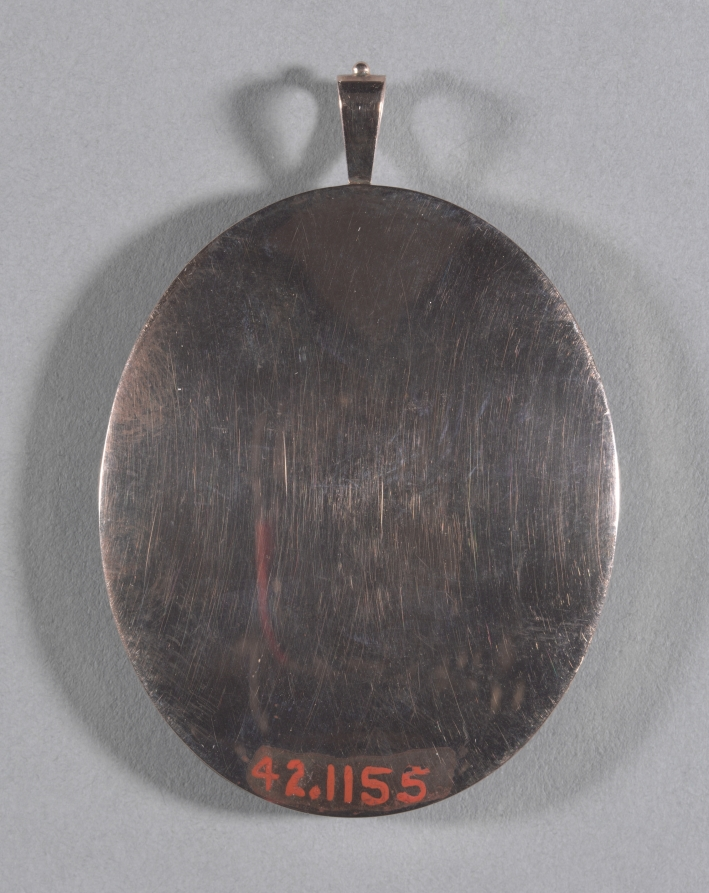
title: Portrait of Mrs. Nathaniel Bailey, née Lamack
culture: England, 18th century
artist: John I Smart (British, 1741–1811)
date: c. 1776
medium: graphite and wash on laid paper in a modern gold frame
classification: Portrait Miniature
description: Although it is impossible to say if it was always part of the artist’s process to execute a preparatory sketch prior to painting each miniature, we do know that John Smart retained many hundreds of these sketches. A group of preparatory sketches—of which this portrait is one—descended through the Smirke family after Smart’s daughter Sarah gave a sketchbook containing preparatory portrait studies to her friend Mary Smirke, sister of the celebrated Victorian architect Sydney Smirke. This book was probably broken up around 1877 when it was divided between Sydney’s daughters Mary Jemmett and Mrs. Lange, whose portions were both sold at auction in 1928. Compared to his contemporaries George Engleheart (1752–1829) and Andrew Plimer (1763–1837), whose female sitters were often painted in similar simple white gowns, Smart often lavished more attention on the costumes in his portraits of women, whose dresses incorporated colored silks, printed fabrics, and luxury trimmings like lace and fur, as seen in this portrait. Mrs. Bailey wears a violet surcoat trimmed with fur, worn over a cream-colored gown trimmed with a border of alternating pearls and blue stones and two vertical rows of pearls with one large pearl between them. Her brown hair is dressed high with ringlets descending down her neck and over her shoulders. The coiffure is ornamented with a strand of pearls and two ostrich plumes. The case is modern, and there is a brownish cast to what was originally pale, cream-colored paper—the result of light exposure changing the color over time. Smart’s preparatory sketches were compiled in books but once removed were often grouped in frames or placed in lockets such as this one. This portrait was part of the Smirke collection owned by Mary Jemmett, who sold it at Christie’s, London, on February 29, 1928. Lot 61 for this sale is described as “Mrs. Bailey, wearing pale mauve and white dress, her hair dressed high and trimmed with feathers.” The sitter, Mrs. Nathaniel Bailey (née Lamack), of Clapham, married the member of Parliament for Abingdon on March 18, 1773. Her husband was of sufficient means and is recorded in 1775 as having performed his annual distribution of £100 of bread and meat to the poor of his borough. Little else is known about this sitter. This drawing was a preparatory study for a portrait on ivory, signed and dated 1776, and measuring 2 inches high. The ivory miniature was formerly in the Ashcroft collection and was sold at Sotheby’s, London, in May 1946 to Arthur Jaffé, having previously been on loan to the Victoria and Albert Museum from 1924 to 1939. In this sale the miniature is described as “An Attractive Miniature of a Lady, by John Smart, signed and dated 1776, head and gaze three-quarters dexter, a white feather and pearls in her high piled chestnut hair, ringlets falling to the shoulders, wearing a pearl and emerald bordered low-cut cream dress and fur trimmed lavender jacket.” It most recently sold at Christie’s, London, in 2003. This portrait miniature is identical to the preparatory sketch here, both of which describe the sitter as wearing a faintly violet costume, though this color is no longer discernible in the sketch. The current location of the miniature on ivory is unknown. Edward Greene donated this and nine other preparatory studies by Smart to the Cleveland Museum of Art in 1941 and 1942. This sketch was acquired by Greene from Leopold Davis for around $260 in 1930. Although this portrait was probably part of the same sketchbook as the other nine purchased by Greene, Davis did not indicate whether or not this was indeed the case. The majority of these sketches were in a compromised condition, with fading and foxing especially prevalent.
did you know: Sketches helped John Smart work out the particulars of a portrait before commencing the miniature on ivory, and they were useful in the event that a duplicate might later be required.